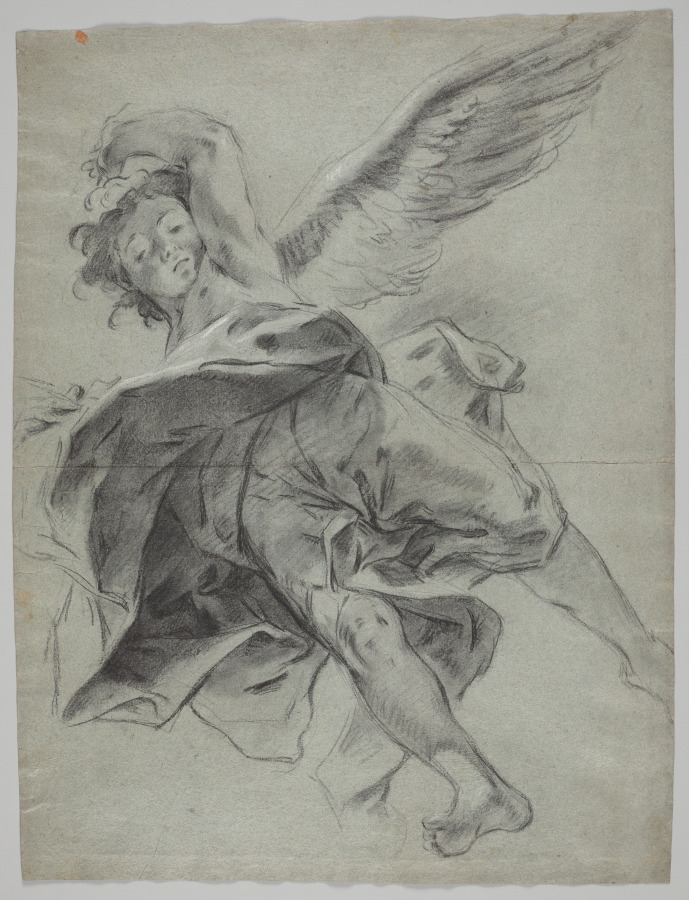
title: A Flying Angel (recto)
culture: Italy, Venice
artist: Giovanni Battista Piazzetta (Italian, 1682–1754)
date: 1723–27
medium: black chalk heightened with traces of white chalk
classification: Drawing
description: This drawing was completed in preparation for the most prestigious religious commission of Giovanni Battista Piazzetta’s career, the ceiling painting of the Glory of St. Dominic for the church of SS. Giovanni e Paolo in Venice. Both the finished painting, which depicts St. Dominic’s arrival in heaven amid a thundery vortex, and Piazzetta’s study for the angel, who carries St. Dominic on a cloud, depart from Venetian tradition. To execute this airborne subject, he likely drew from wax or clay models suspended in midair in order to study the illusionistic di sotto in su (from below to above) perspective and the play of light found on the angel’s shadowed form. He worked out the angel’s twisting pose, imbuing it with a lively sense of movement, and accentuated the drapery’s folds with heavy lines as though considering their visibility from afar. There are only slight changes in the angel’s pose between this drawing and the completed painting. As few of Piazzetta’s preparatory studies for paintings exist, Cleveland’s sheet offers rare insight to the artist’s working methods.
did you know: The Venetian blue paper (carta azzurra) of this sheet was the preferred medium for preparatory drawings among artists in Venice at the time this drawing was made.